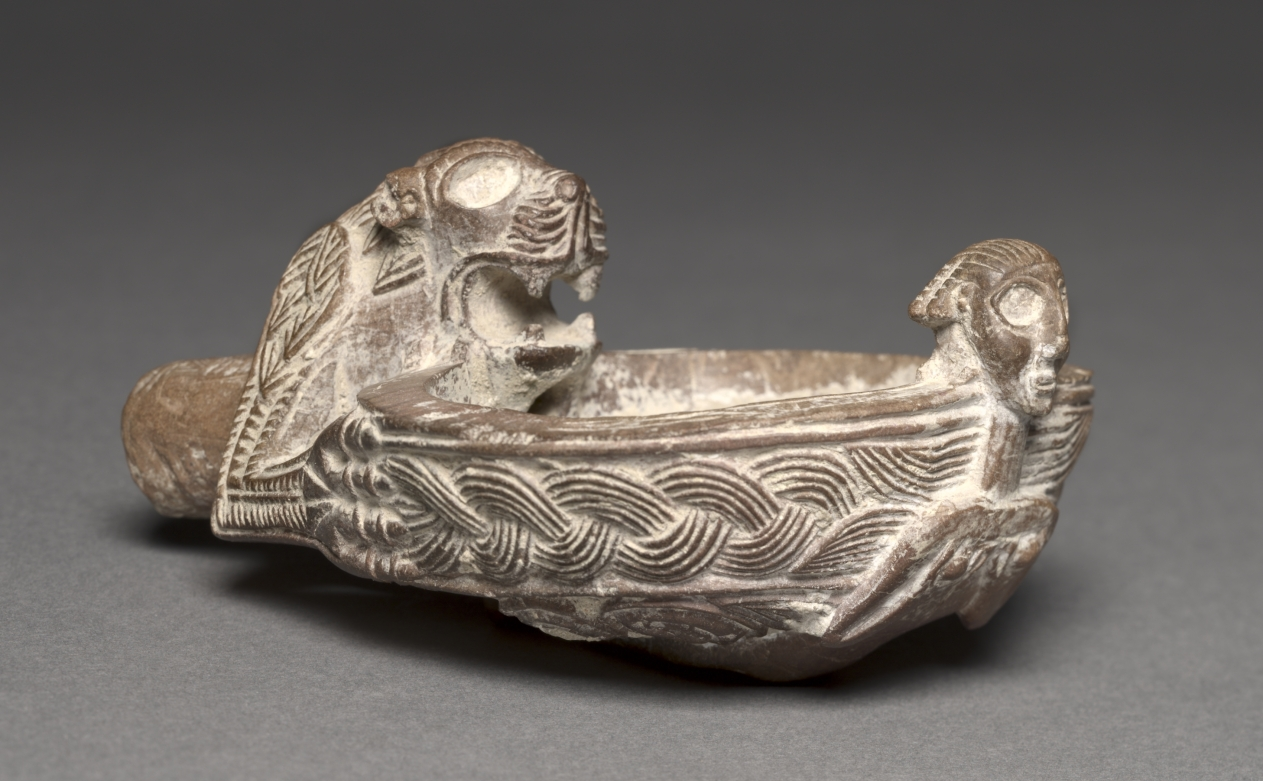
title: Libation Dish-Jar Stopper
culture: Syria, Hittite (?) or Middle Iron Age, Tell Ahmar, Djezizeh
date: 1600–700 BCE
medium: stone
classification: Sculpture